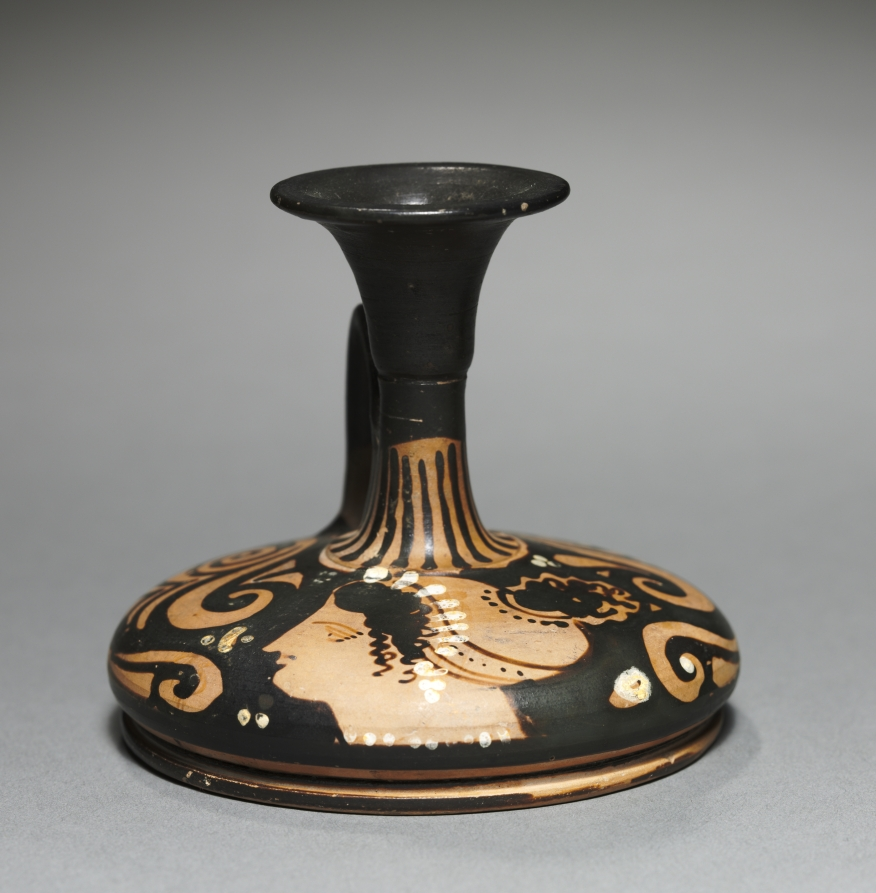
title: Red-Figure Squat Lekythos (Oil Vessel): Female Head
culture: South Italian, Apulian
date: 350–300 BCE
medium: ceramic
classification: Ceramic